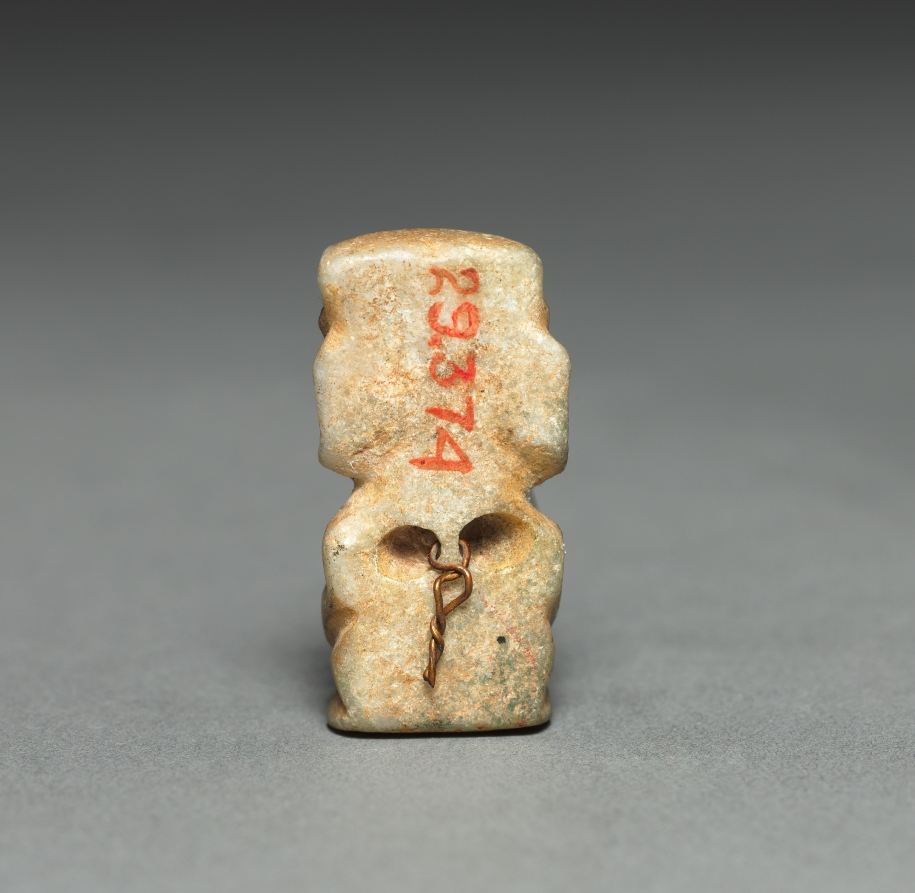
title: Figurine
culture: Mexico, Valley of Mexico (?)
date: before 1521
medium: jadeite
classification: Jade